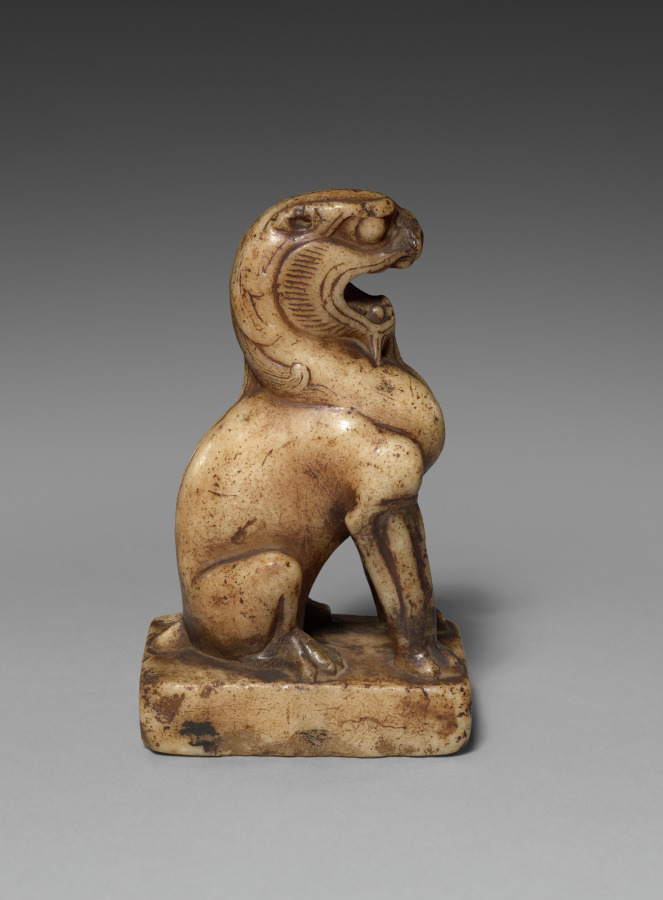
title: Lion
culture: China, Tang dynasty (618-907)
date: 618–907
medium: marble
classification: Sculpture